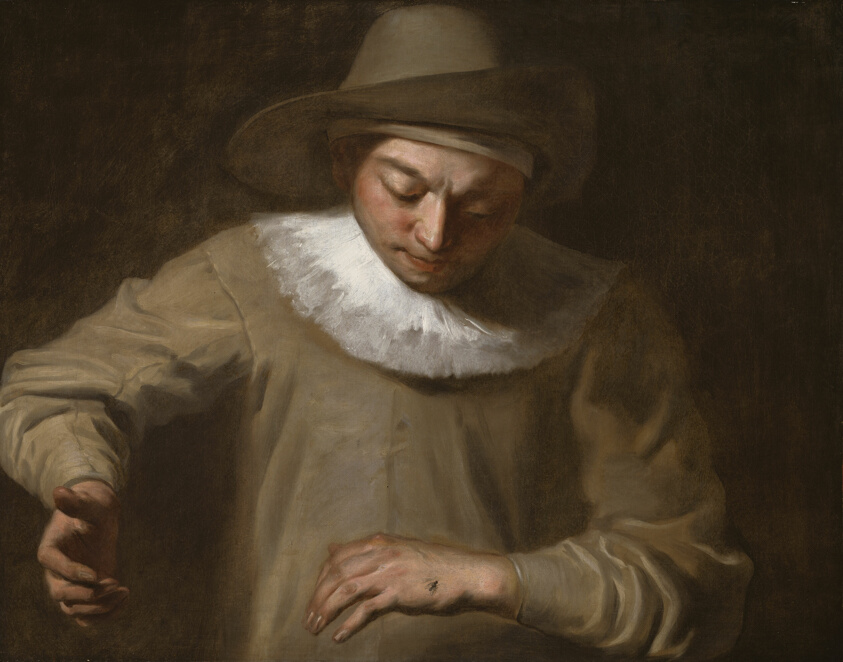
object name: Painting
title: Pierrot Catching a Fly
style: 18th Century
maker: Attributed to Philippe Mercier (French, 1689–1760)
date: 1740/50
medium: Oil on canvas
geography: France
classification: oil on canvas; paint; french; oil paintings (visual works); painting; european painting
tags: man, insects, hat, costume, brown (color)